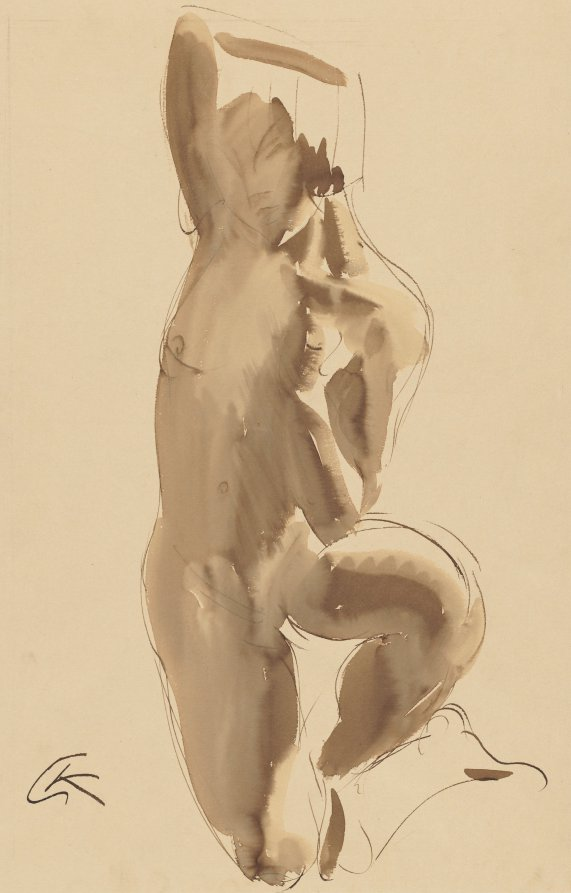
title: Nude Study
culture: Germany, 20th century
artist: George Kolbe (German, 1877–1947)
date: first quarter 1900s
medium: pen and brown ink and brush and brown wash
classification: Drawing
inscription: signed, lower left, in brown ink: GK ; lower left, in graphite: su